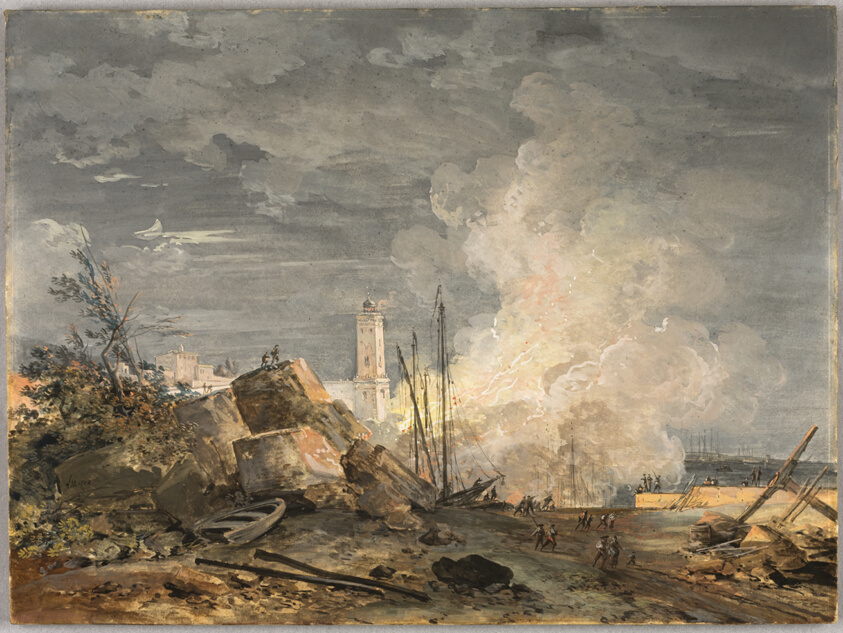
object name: Drawing and Watercolor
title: Fire in the Port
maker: Louis Gabriel Moreau (French, 1740-1806)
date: 1788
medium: Gouache, over traces of graphite, on cream laid paper, edge mounted on board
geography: France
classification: gouache; drawings (visual works); prints and drawing